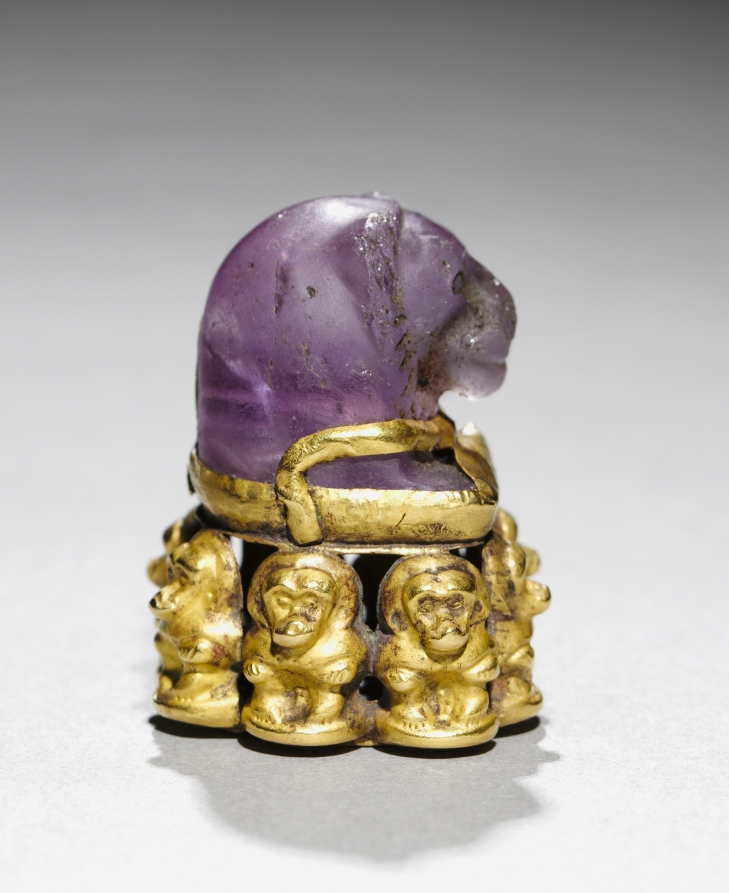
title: Pendant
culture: Sudan, Napatan; lion's head component: probably Egypt, Third Intermediate (1069–715 BCE), Dynasty 25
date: c. 700 BCE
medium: amethyst and gold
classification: Jewelry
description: This pendant consists of two parts: a superbly carved lion’s head in amethyst that has been set into a D-shaped gold base consisting of a platform surrounded by eight seated baboons. The lion’s head is an heirloom from the New Kingdom, most likely a gaming piece that had been adapted in the Napatan period to serve as an pendant amulet. This procedure was fairly common in antiquity as a means of recycling precious stones. The importance of leonine deities in Nubian religion was obviously the motivating force behind the creation of this spectacular ornament.